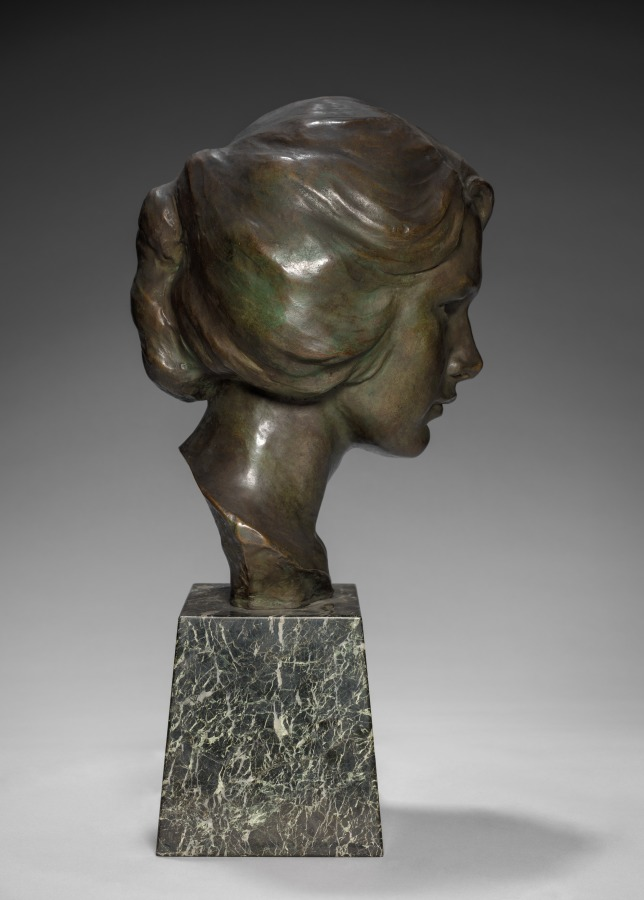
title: Head of a Girl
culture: America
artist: Nancy Coonsman (American, 1888–1920)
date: c. 1920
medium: bronze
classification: Sculpture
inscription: signed back of neck: Nancy Coonsman © R.C. & N.M. Vose/Roman Bronze Works New York.